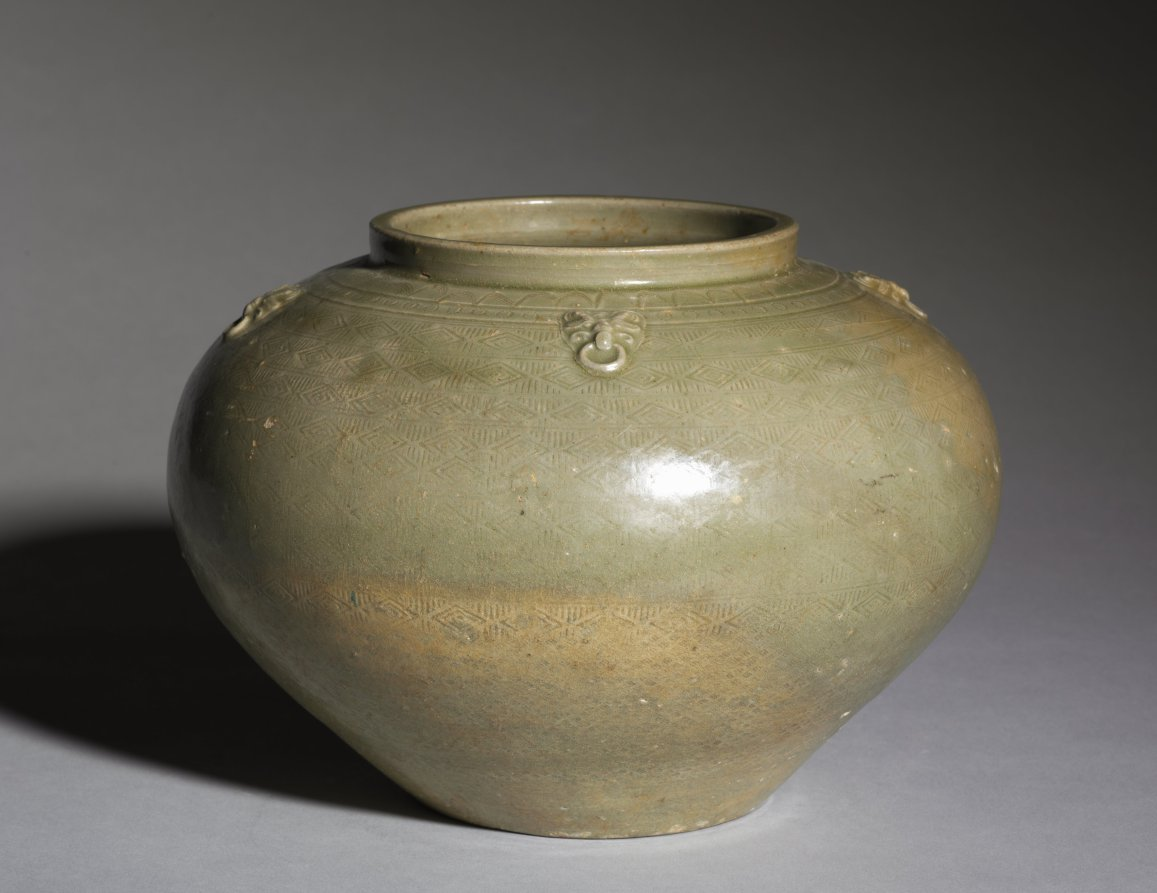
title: Jar: Proto-Yue ware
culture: China, Western Jin dynasty (265-316 CE)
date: 265–317 CE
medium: gray stoneware with combed, impressed, molded and applied decoration under iron glaze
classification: Ceramic